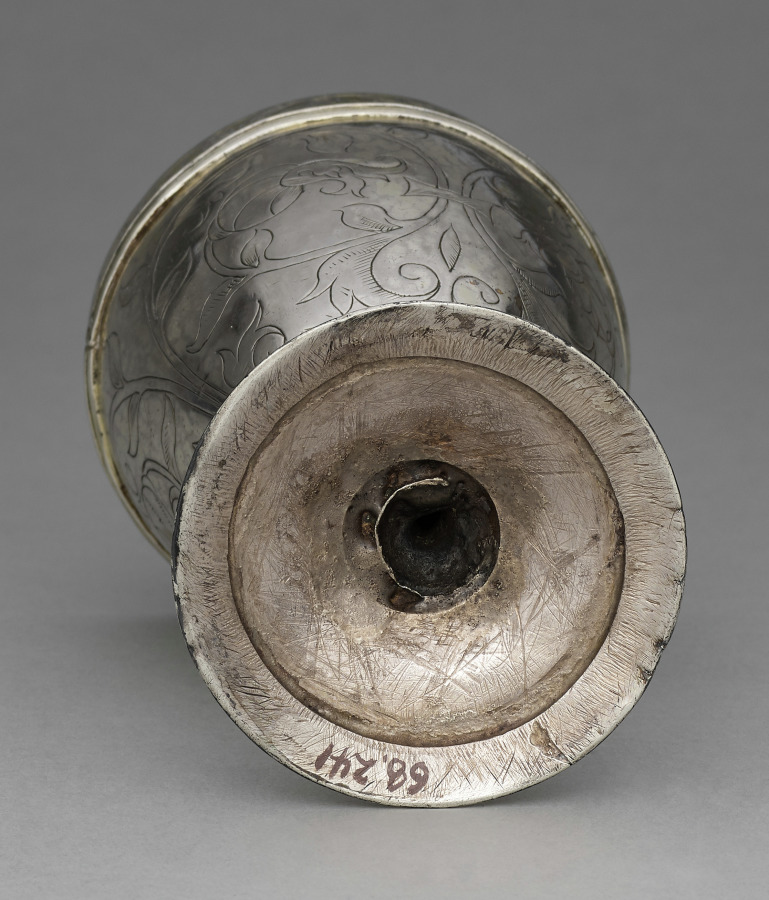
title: Standing Cup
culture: London, England: late 16th century, late 16th century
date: 1593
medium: silver, partially gilt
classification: Silver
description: Produced during the last years of the Tudor dynasty (1485–1603), this vessel exemplifies the symmetrical patterns, horizontal designs, and clear division of space typical of English silverwork at the time. The functional shape and ornamental designs characteristic of standing cups made them ideal for ceremonial occasions.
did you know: This cup has a lid. See cover record.